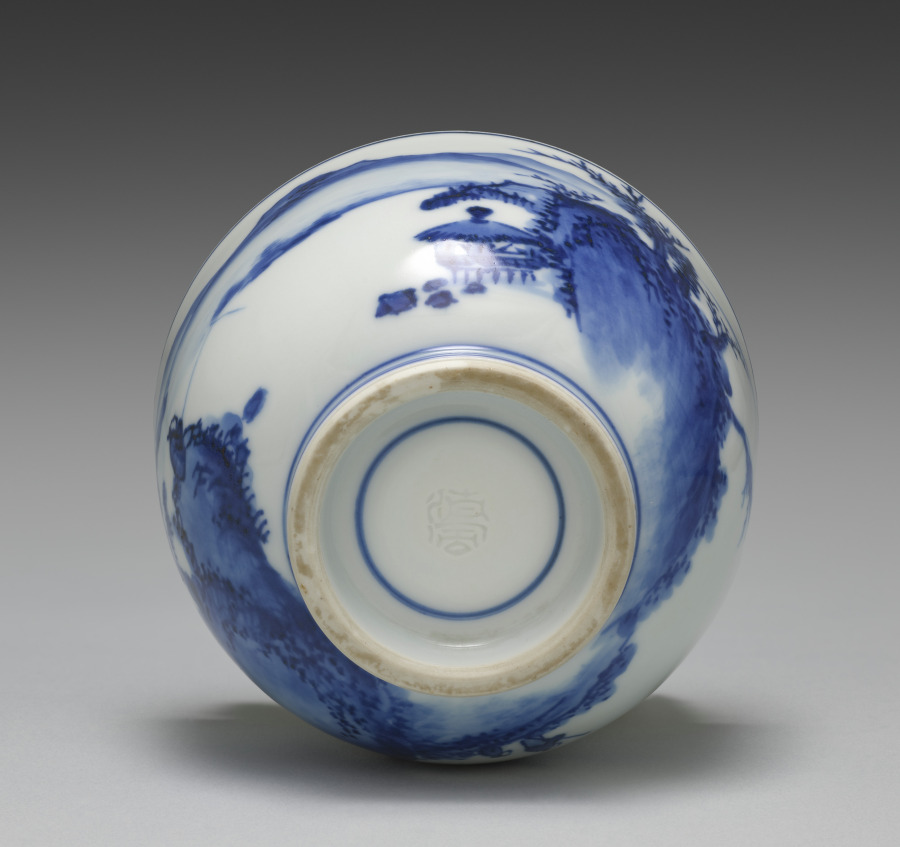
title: Bowl with Chinese Landscape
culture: Japan, Meiji period (1868–1912)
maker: Seifū Yohei III (Japanese, 1851–1914)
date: 1893–1914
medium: porcelain with underglaze blue and overglaze red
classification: Ceramic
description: This bowl has a landscape with figures in blue and iron oxide. The scene is set along a river with mountains in the distance, likely in the Jiangnan region of southern China, famous for compositions of the Eight Views of the Xiao and Xiang Rivers and of West Lake in Hangzhou. There are two people in the foreground: one person fishes along the riverbank across from a rustic hermit’s lodge sited on stilts over the water’s edge; on the other side of the bowl, a person with a tall staff gazes at the full moon, accompanied by his servant. The foot has a double band in blue, while another blue band encircles the bowl just beneath the rim, which is covered in red iron oxide. The inside of the footring is also circled in blue around the impressed mark.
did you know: The flock of geese making its way across the sky and the many bare tree branches suggest the season may be autumn.